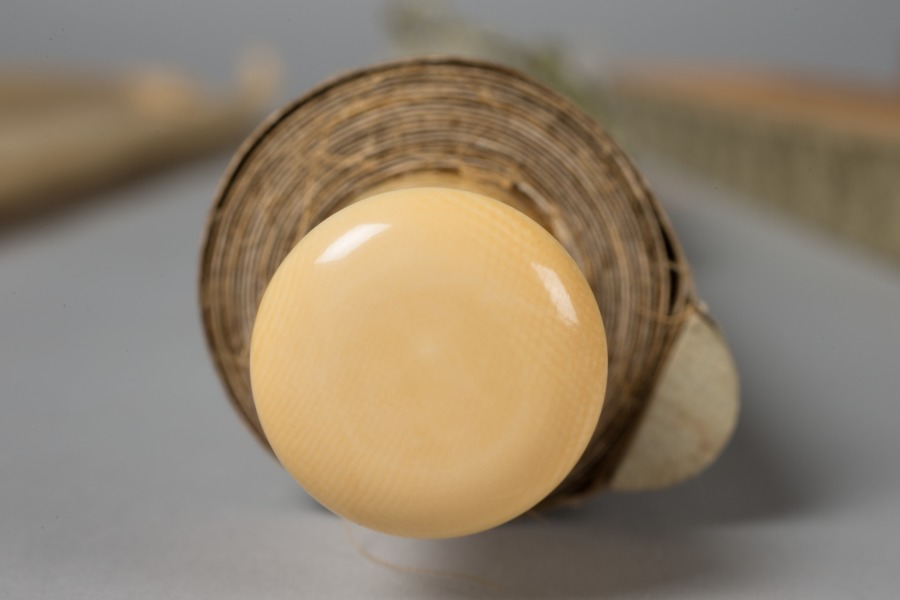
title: Happy Forest, from Water Margin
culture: Japan, Edo period (1615–1868)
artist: Matsumura Goshun (Japanese, 1752–1811)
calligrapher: and Amenomori Shōteki (Japanese, 1731–1786)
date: late 1700s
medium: hanging scroll; ink and color on paper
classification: Painting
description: The Chinese literary classic Water Margin is set in the 1120s and tells the story of 108 outlaws who first rebel against the government and then join forces with it. This painting depicts an episode in which hero Wu Song reclaims the tavern Happy Forest for its rightful owner, the prison warden’s son, Shi En. To prepare for the fight, Wu Song drinks a lot of wine. The painting was inscribed with a quote in which an ally describes Wu Song’s fighting style. It reads as follows: Where his twin fists rise, clouds and thunder roar, When his flying kick comes, wind and rain tremble.